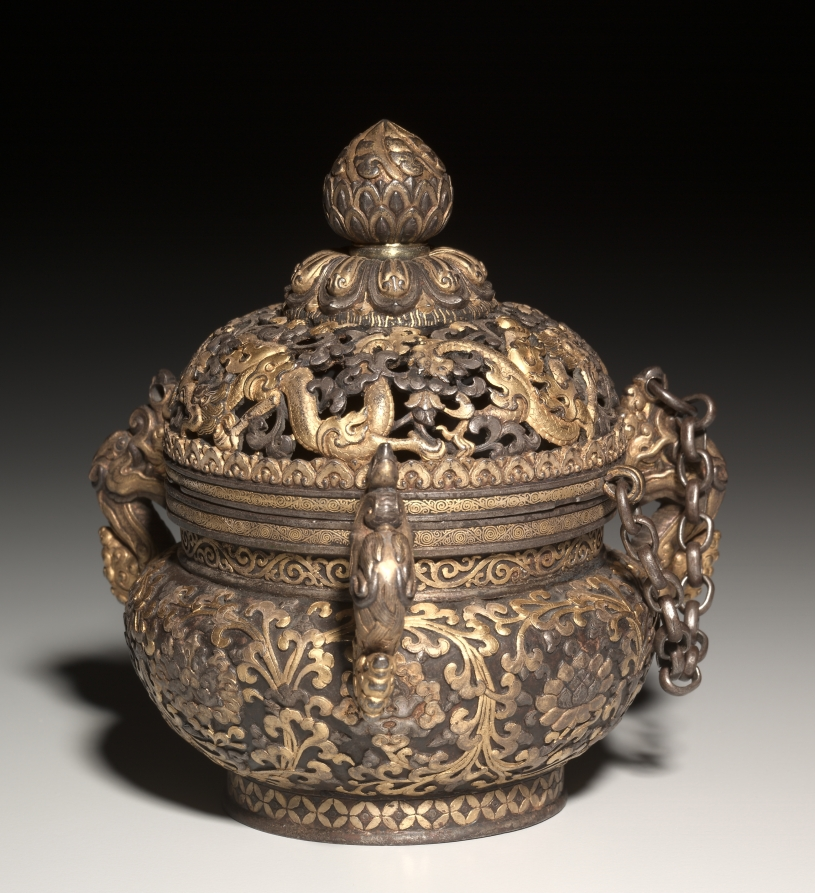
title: Incense Burner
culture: China, Yongle Period (1403-1424)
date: early 1400s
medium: iron inlaid with gold and silver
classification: Metalwork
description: This incense burner with gold and silver inlay has three dragon-head handles. Its main body is decorated with flowers placed in round fields formed by a winding creeper. The perforated cover is decorated with a dragon. The lotus bud on the top is used as a handle.